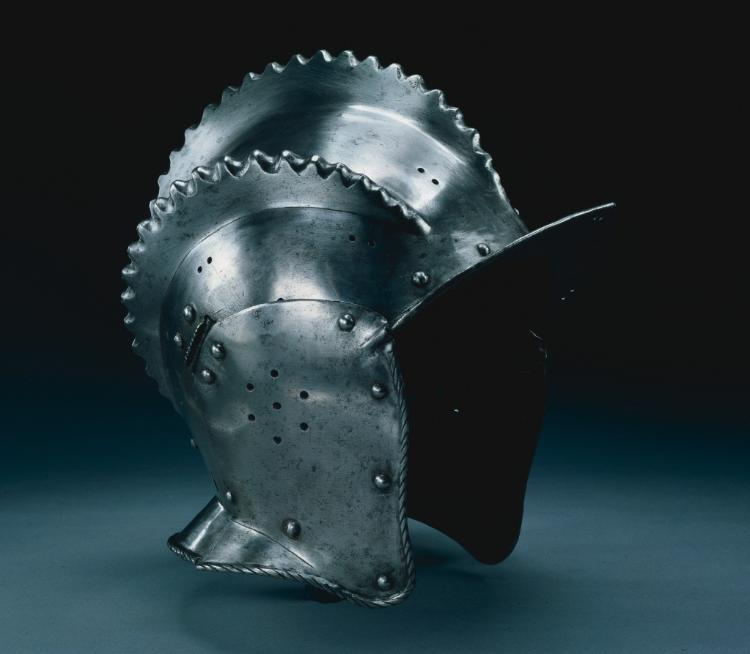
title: Triple-Crested Burgonet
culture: Germany, Augsburg (?), 16th century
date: c. 1560–70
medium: steel, leather bands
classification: Arms and Armor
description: Popular throughout the 1500s and 1600s, the burgonet was a light, open headpiece favored by cavalry and infantry alike. Its main features are a peak over the eyes and hinged cheekpieces that fasten with a strap or lace under the chin. The basic helmet lent itself to variations of design or ornamentation. This version, with its triple crests, is known to have been produced in Augsburg. The style was worn by the bodyguard of Emperor Charles V (ruled 1519-56).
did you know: The open face of the burgonet meant it was a lighter and cheaper to manufacture than closed face helmets, it also allowed the wearer to see more freely, the trade off was less protection for the face.